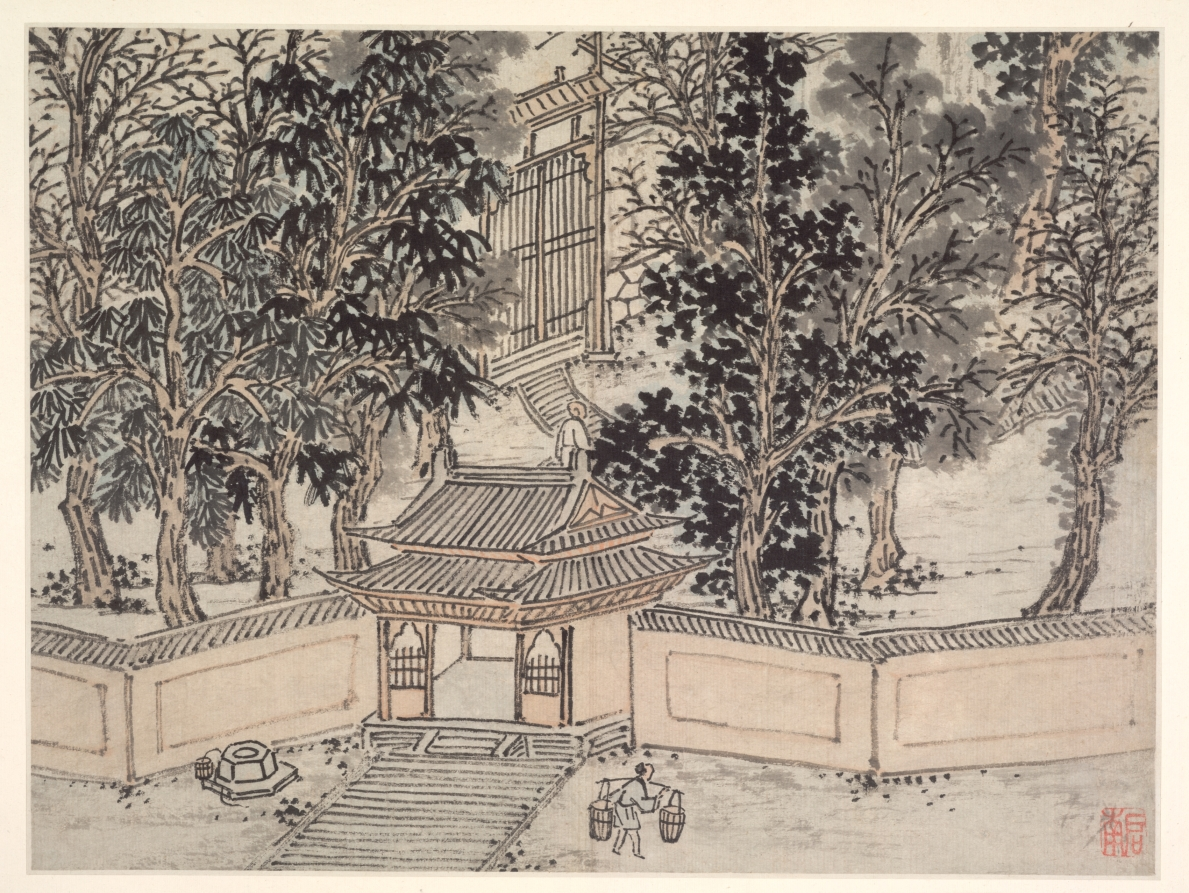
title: Tiger-Flight Spring at the Back Gate, from Twelve Views of Tiger Hill, Suzhou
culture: China, Ming dynasty (1368–1644)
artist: Shen Zhou (Chinese, 1427–1509)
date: after 1490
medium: Album leaf; ink on paper or ink and slight color on paper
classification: Painting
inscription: [印] 启南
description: Views of Tiger Hill depicts a historic site a few miles northwest of Suzhou. The scenes simulate a visit from arriving by boat at the foot of the mountain to climbing to Cloudy Cliff Monastery. Representations of the artist’s mature style, Shen Zhou included views in subtle colors in the suite of monochrome scenes. A Suzhou native, Shen Zhou was supported by family wealth and rejected an official career in favor of life as a retired scholar. Turning to painting in midlife, he is regarded as the founder of the Wu School of painting, with its center in Suzhou.